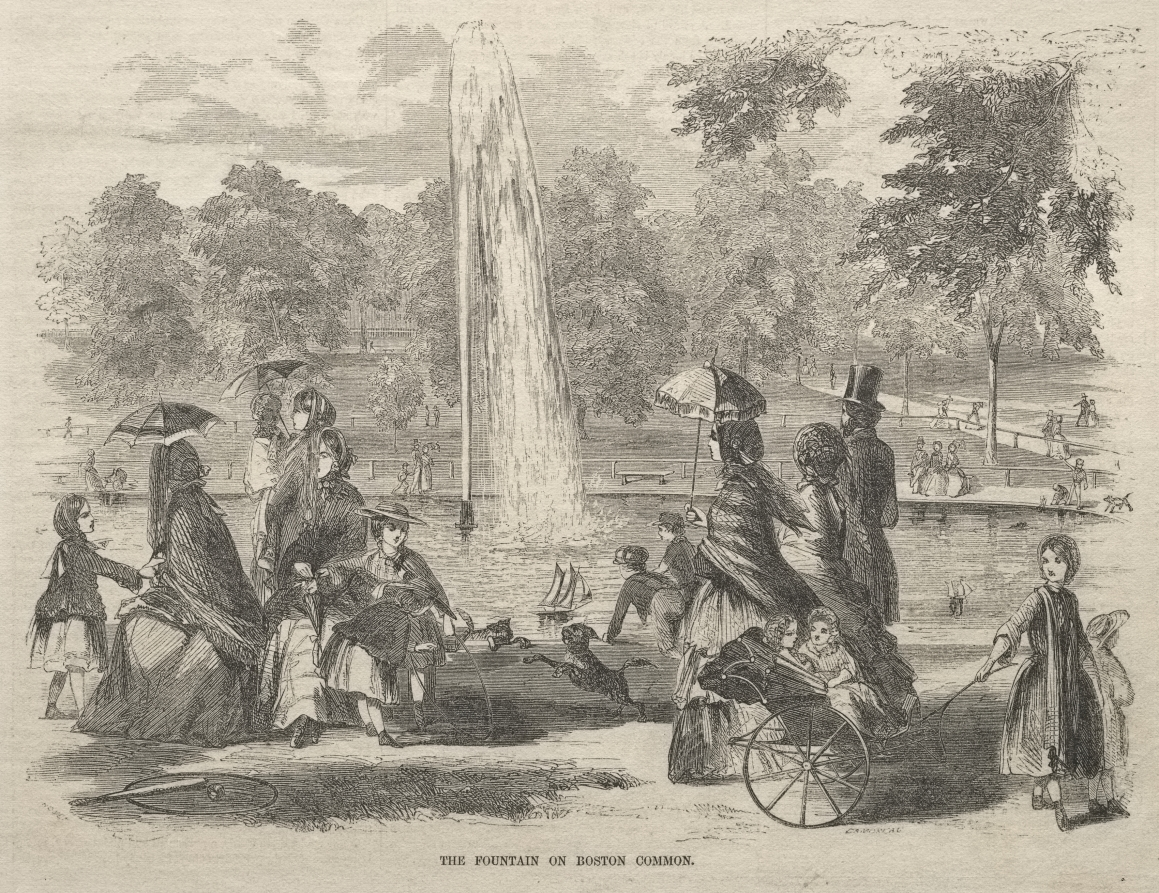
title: The Fountain at Boston Common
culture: America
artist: Winslow Homer (American, 1836–1910)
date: 1857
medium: wood engraving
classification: Print